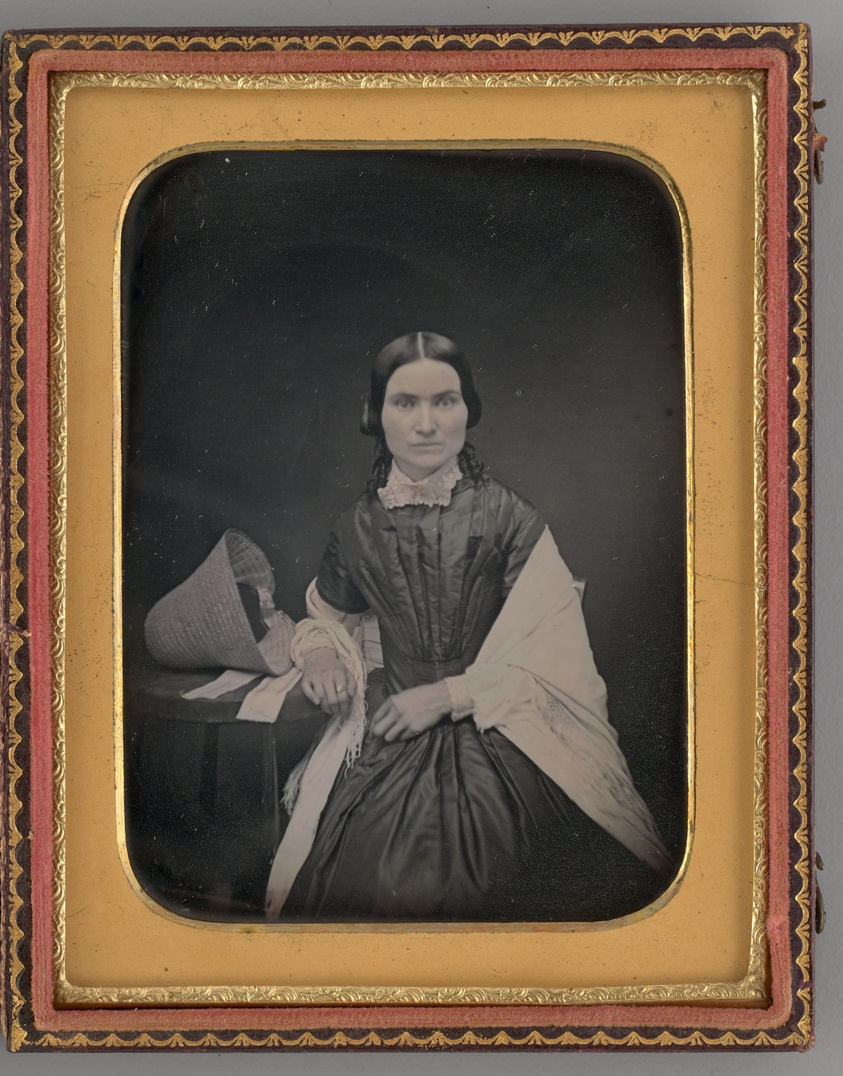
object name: Photograph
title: Untitled (Portrait of a Woman)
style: 19th century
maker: Unknown maker; American, 19th century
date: 1853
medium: Daguerreotype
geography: United States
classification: portrait; photograph; photographic process; photography; portrait; daguerreotype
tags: lundberg collection, portraits, portraits: female subject, female, portrait